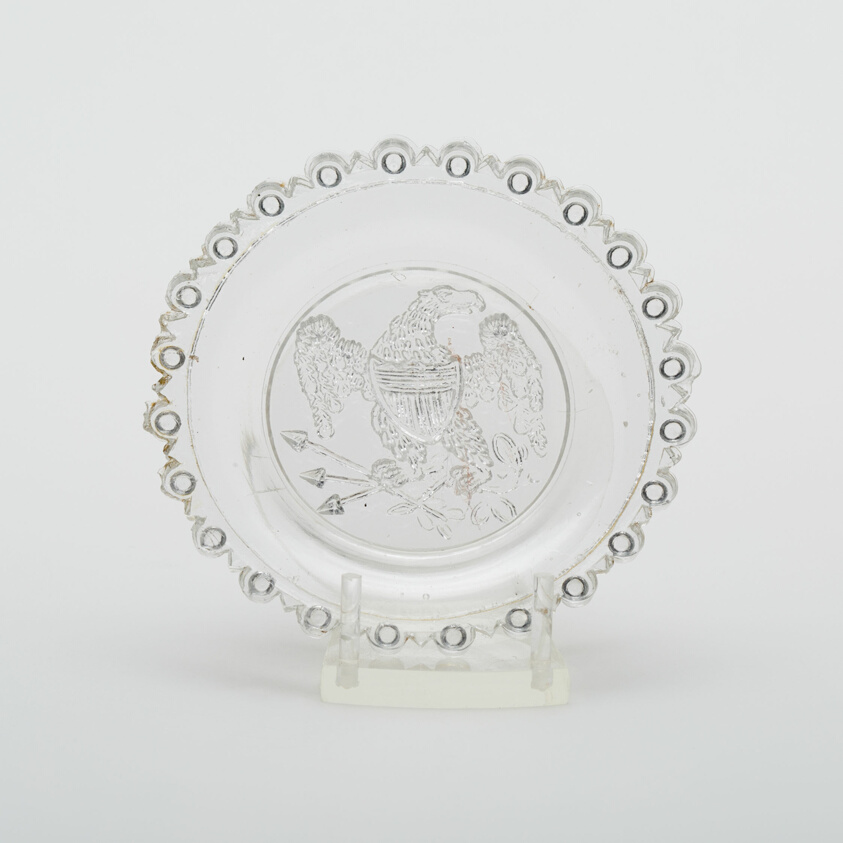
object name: Glass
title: Cup plate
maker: Artist unknown (American, 19th century); Wheeling, West Virginia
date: 1830–35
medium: Pressed glass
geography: Wheeling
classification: plate (general, dish); glass; american decorative arts; american arts; decorative arts